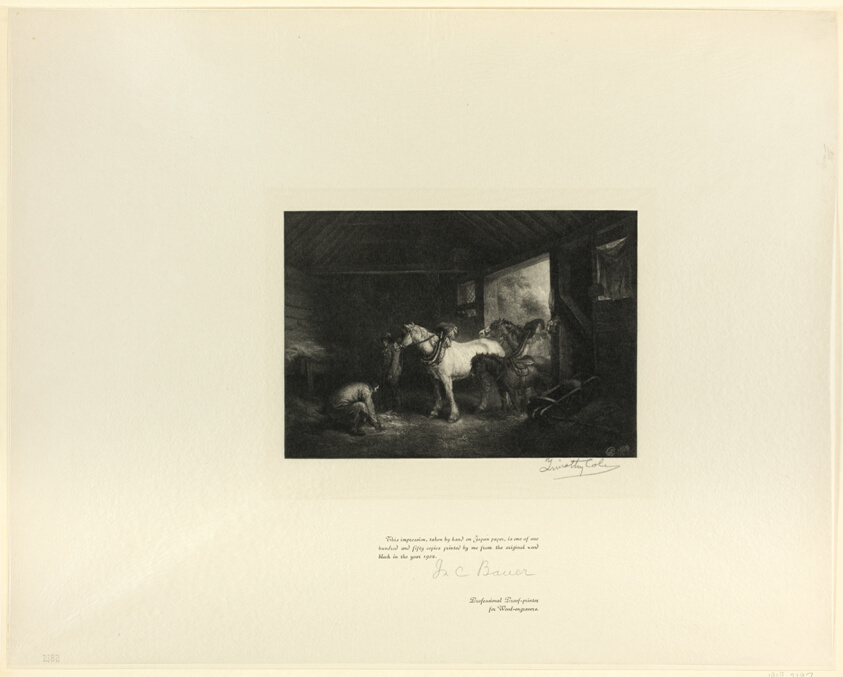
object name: Print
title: Stable Interior, from Old English Masters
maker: Timothy Cole (American, born England, 1852-1931); after George Morland (English, 1763-1804)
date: 1899, printed 1902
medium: Wood engraving on chine paper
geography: United States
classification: wood engraving; print; prints and drawing